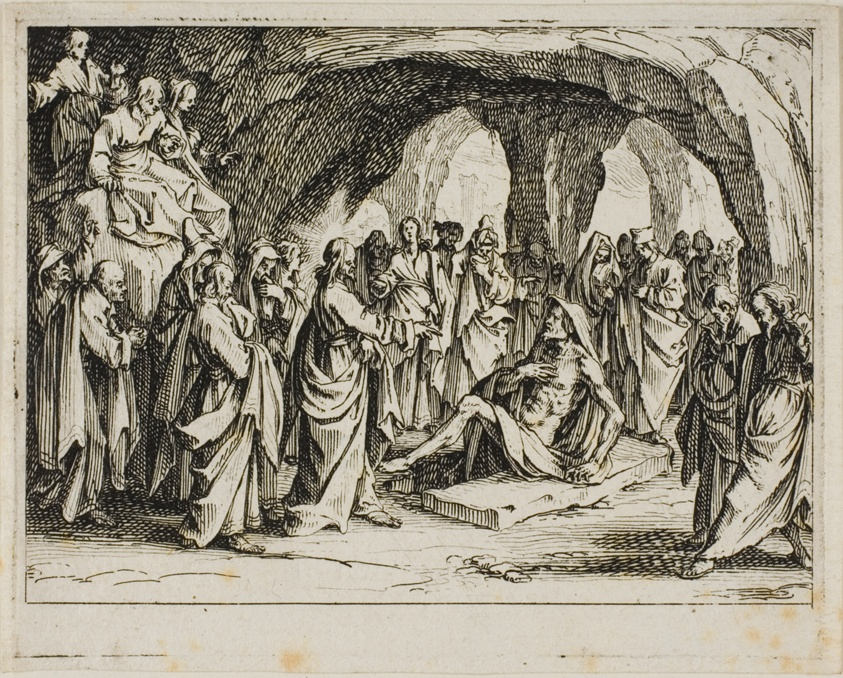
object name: Print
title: The Resurrection of Lazarus, from The New Testament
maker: Jacques Callot (French, 1592-1635); published by Israël Henriet (French, 1590-1661)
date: 1635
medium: Etching on paper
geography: France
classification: etching; print; prints and drawing